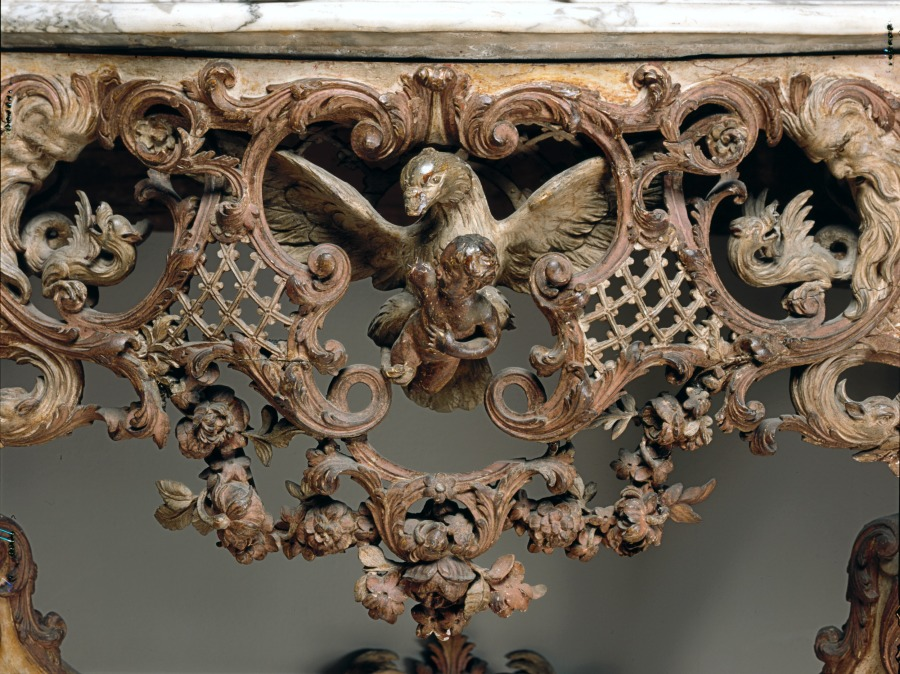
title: Console Table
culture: France, 18th century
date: c. 1720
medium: carved and painted wood, marble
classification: Furniture and woodwork